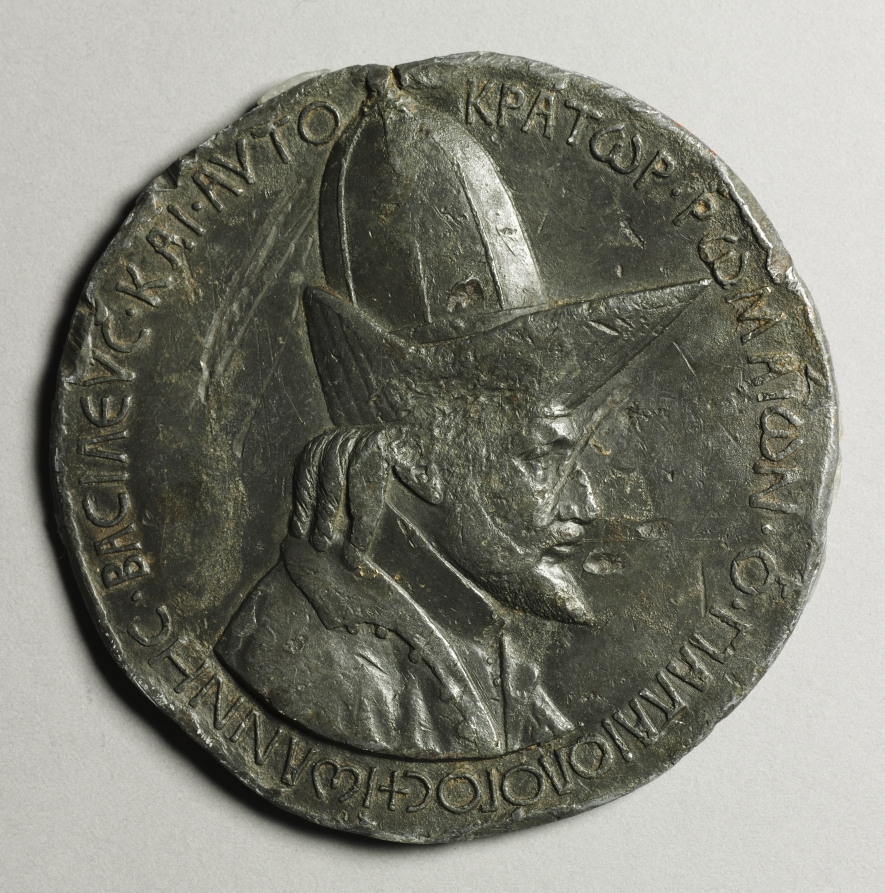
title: Portrait of John VIII Palaeologus, Emperor of Constantinople, 1424-1428 (obverse)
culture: Italy, 15th century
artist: Pisanello (Italian, Ferrara, c. 1395–1455)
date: c. 1438–1439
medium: lead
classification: Sculpture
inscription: obverse: IWANNHC BACI EVC KAI AVTOKPATWP PWMAIWN O A AIOA O OC [John King and Emperor of the Romans, Palaeologus]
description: The art of the medal was introduced into Italy by Pisanello, His work as a medalist began with the portrait medal of this emperor, who, in 1438, visited the Council of Ferrara.